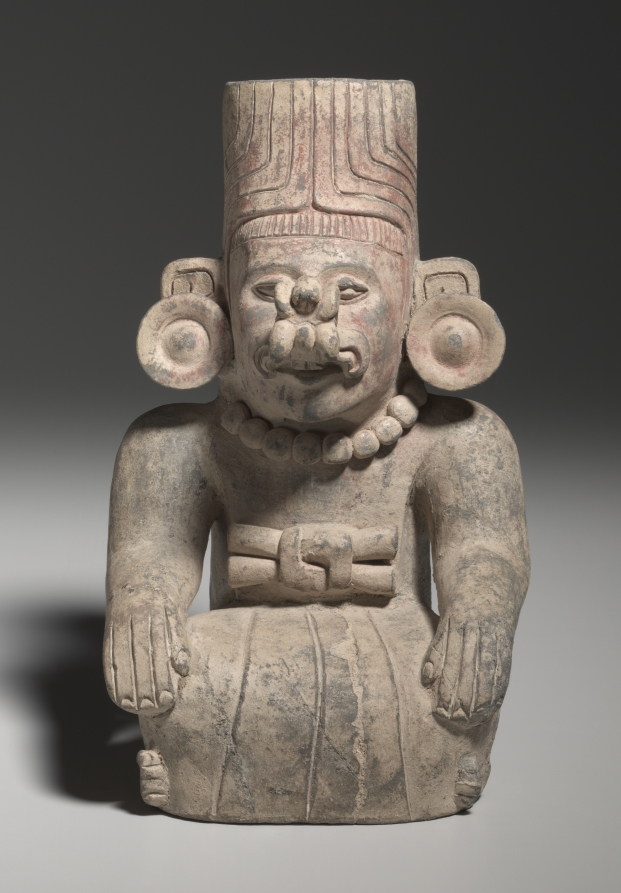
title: Urn Figure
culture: Mexico, Oaxaca, Zapotec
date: c. 200–500 CE (thermoluminescence date, 60 BCE–390 CE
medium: earthenware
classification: Sculpture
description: The figure projecting from the front of a cylindrical container wears a mouth mask perhaps shaped as a serpent’s fanged upper jaw. It probably served in a tomb as a companion to a larger, more complex figural urn. Though termed "urns," these ceramics do not contain the cremated ashes of the dead but usually are found empty.